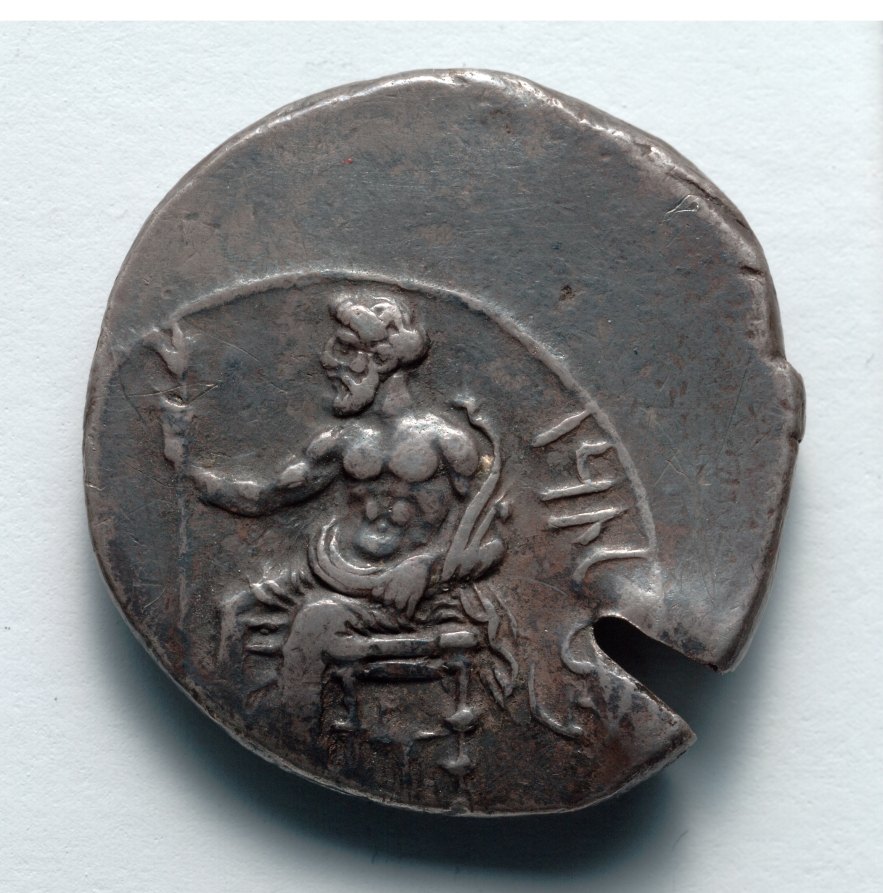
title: Stater: Ba'al, Seated with Scepter, within Circle (obverse)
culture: Iran, Achaemenid (550–330 BCE), minted at Tarsos (Kilikia)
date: 379–374 BCE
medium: silver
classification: Coins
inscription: 𐡁𐡏𐡋]𐡕𐡓𐡆]